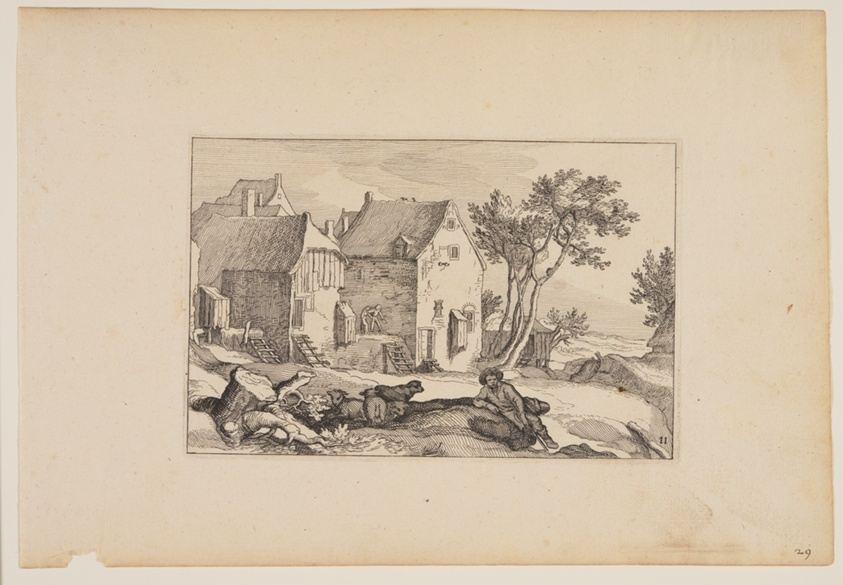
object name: Print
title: A Farmyard, Resting Shepherd in Centre Foreground, from Landscapes (Verscheyden aerdige Lanthuysen...)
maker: Claes Jansz. Visscher (Netherlandish, c. 1550–c. 1612); after Abraham Bloemaert (Dutch, 1566–1651)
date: 1620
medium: Etching on ivory laid paper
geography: Netherlands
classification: print; paper; prints and drawing; etching